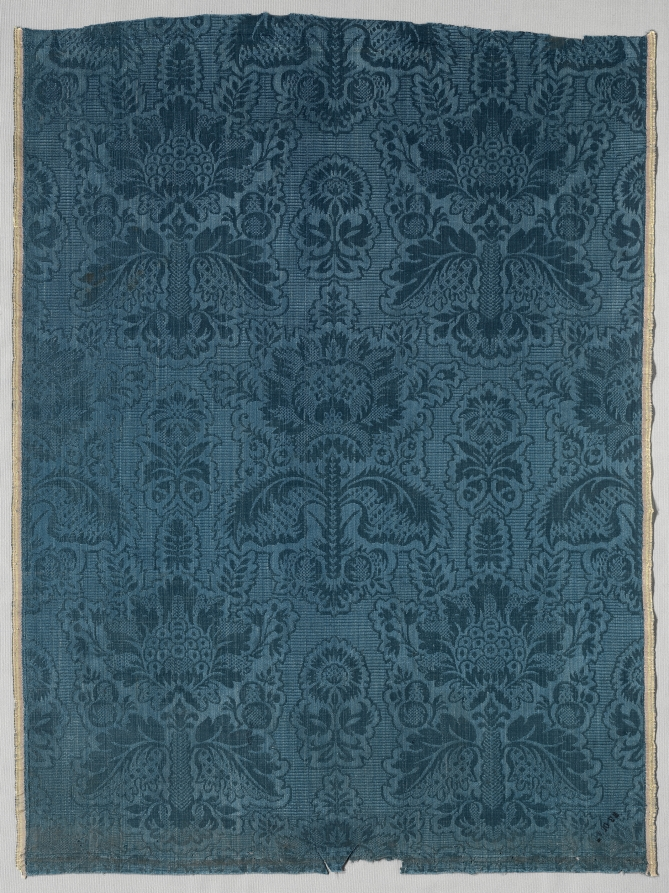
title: Fragment of Figured Silk for Upholstery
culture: France, first half of 18th century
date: 1700–1750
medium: damask and cannelé, silk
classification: Textile